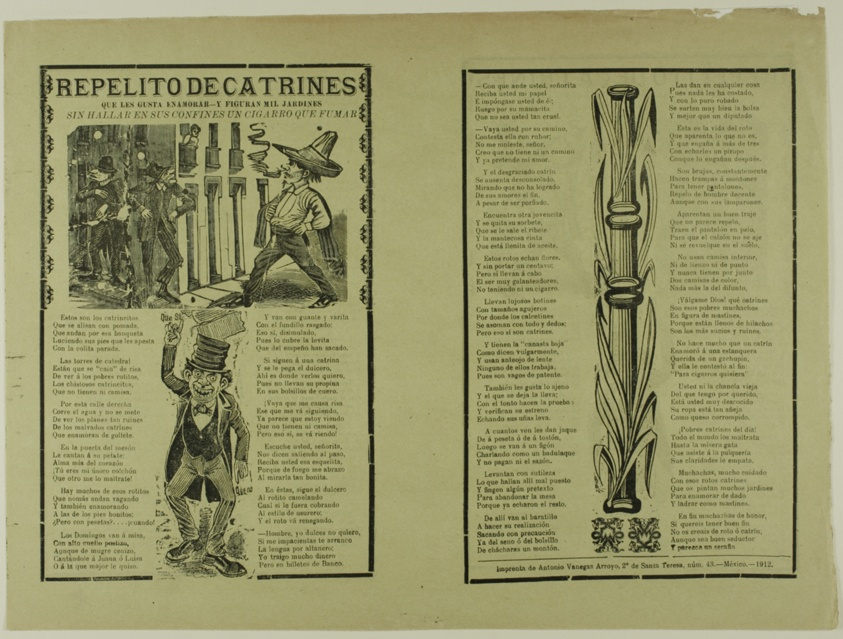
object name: Print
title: Hand-me-downs of Dandies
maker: José Guadalupe Posada (Mexican, 1852-1913)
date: 1912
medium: Relief engraving on paper (upper left) and photo relief etching (lower left) on tan wove paper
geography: Mexico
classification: relief etching; print; prints and drawing